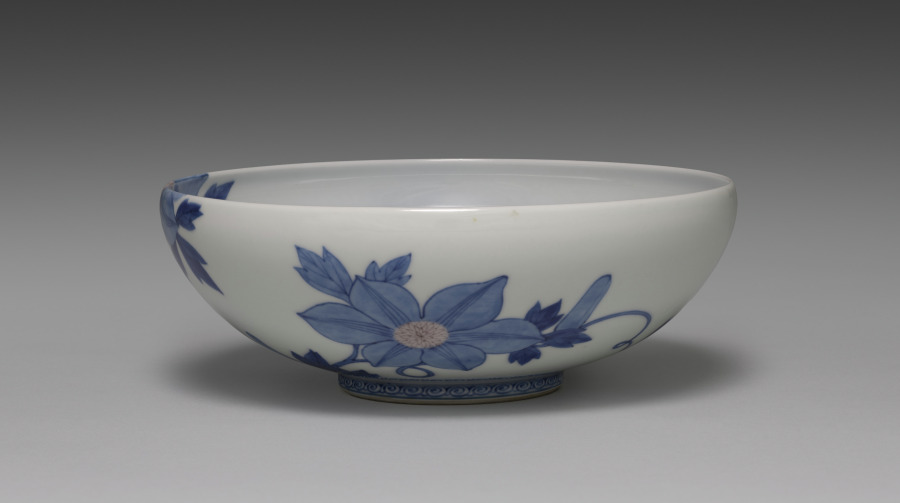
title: Dining Bowl with Clematis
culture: Japan, Meiji period (1868–1912)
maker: Seifū Yohei III (Japanese, 1851–1914)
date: 1893–97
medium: Porcelain with underglaze and overglaze colors, molded and incised designs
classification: Ceramic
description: The bowl is an especially well-executed example of Yohei III’s work in underglaze blue combined with other underglaze colors. This low-profile dining bowl has paintings of flowering clematis vines under the glaze in blue and red. Water is depicted with blue in the bottom of the bowl. The lines of white used to show motion on the water’s surface were created using either a reserve technique, where blue was omitted, or a masking technique, where parts of the surface were covered before applying the blue. A pair of butterflies flutters across one side. The foot is decorated with a pattern of spirals in blue, and the lip curves in slightly. The overall effect is one of seeing the flowering vine hanging down, hovering just above the surface of a pond, whose slight disturbances hint at unseen fish swimming below.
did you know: This bowl shows an environment painted in the round.